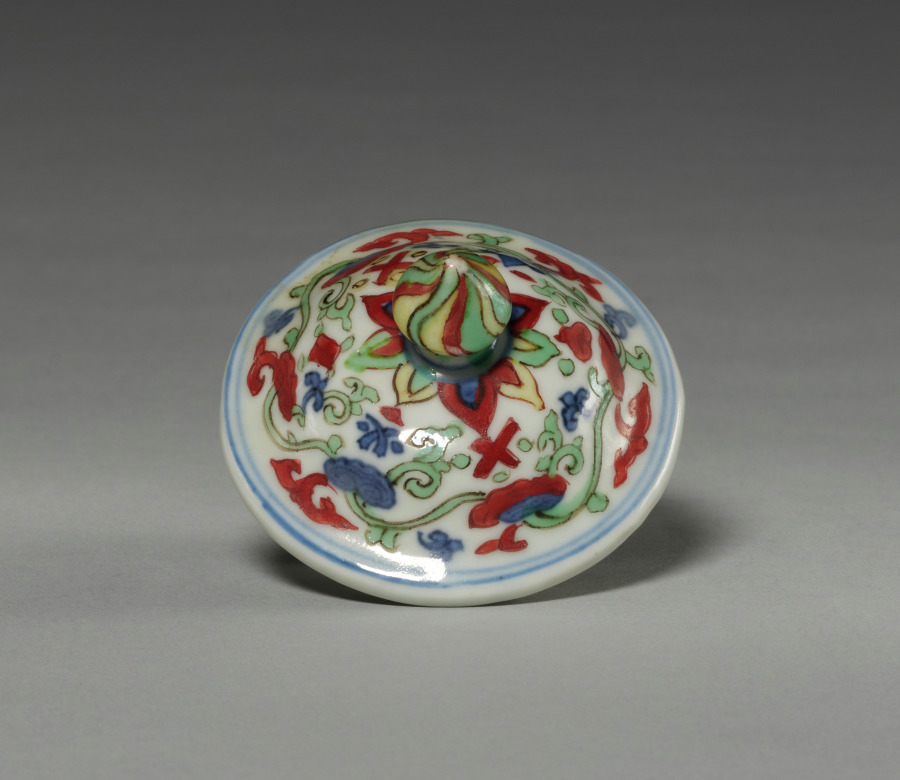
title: Covered Jar (lid)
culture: China, Jiangxi province, Jingdezhen kilns, Ming dynasty (1368-1644), Wanli reign (1573-1620)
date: 1573–1620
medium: porcelain with blue underglaze decoration and overglaze enamels in red, green, and yellow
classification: Ceramic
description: In the Ming (1368–1644) and Qing (1644–1911) dynasties, luxury items became more affordable to larger parts of the society, including women, merchants, and literati in non-official positions. Imperial patronage and a growing urban population encouraged consumption of luxury goods and local craftmanship. This covered porcelain jar has blue underglaze and overglaze in red, green, and blue enamels. It shows Ming dynasty advancements in porcelain decoration and the creative mind of the talented artisans who made it.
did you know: This jar is painted with 16 figures of all ages enjoying a garden setting.